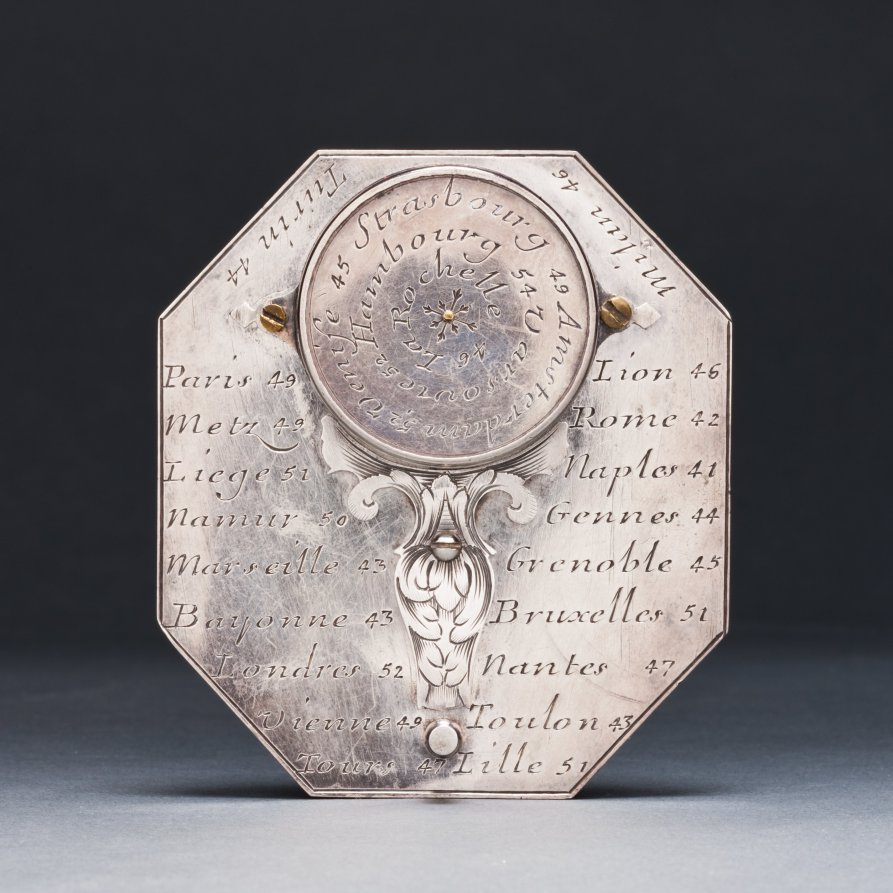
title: Butterfield Sundial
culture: France, 18th century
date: 1700s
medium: silver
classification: Silver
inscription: [Engraved signature above the compass in ribbon band]: "N. BION A Paris"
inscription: [Engraved on the face of the sundial]: “Pour 55° 4-5-6-7-8-9-10-11 50° IIII-V-VI-VII-VIII-IX-X-XI 45° 5-6-7-8-9-10-11 40° -VI-VII-VIII-IX-X-XI'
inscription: [Engraved on the other side]: "Pour 55° -8-7-6-5-4-3-2-1-0 50°-VIII-VII-VI-V-IIII-III-II-I 45°-8-7-6-5-4-3-2-1 40°-VII-VI-V-IIII-III-II-I"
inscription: [Engraved around the compass]: “NORD-OUEST-SUD-EST”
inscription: [Engraved on the back of the sundial]: “Turin 44 Milan 46 Paris 49 Lion 46 Metz 49 Rome 42 Liege 51 Naples 44 Namur 50 Gennes 44 Marseille 43 Grenoble 45 Bayonne 43 Bruxelle 51 Londres 52 Nantes 47 Vienne 48 Toulon 43 Tours 47 Lille 51”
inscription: [Engraved around the back of the compass]: “Venise 45 Strasbourg 49 Amsterdam 52 Hambourg 54 Varsovie 52 La Rochelle 46”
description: Butterfield-type sundials are characterized by their adjustable gnomons, metal flaps that cast a shadow on the dial’s face to indicate the hour, and geographical indices. This sundial has a scale adjustable between latitudes of 40° to 60° north. The latitudes of 26 European towns are engraved on its back for quick reference. With an intricately engraved silver face, it would have functioned as a fashionable traveler’s accessory.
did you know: Butterfield-style sundials were named after Micheal Butterfield, an English scientific and mathematical instrument maker who worked in Paris between 1674 and 1724.